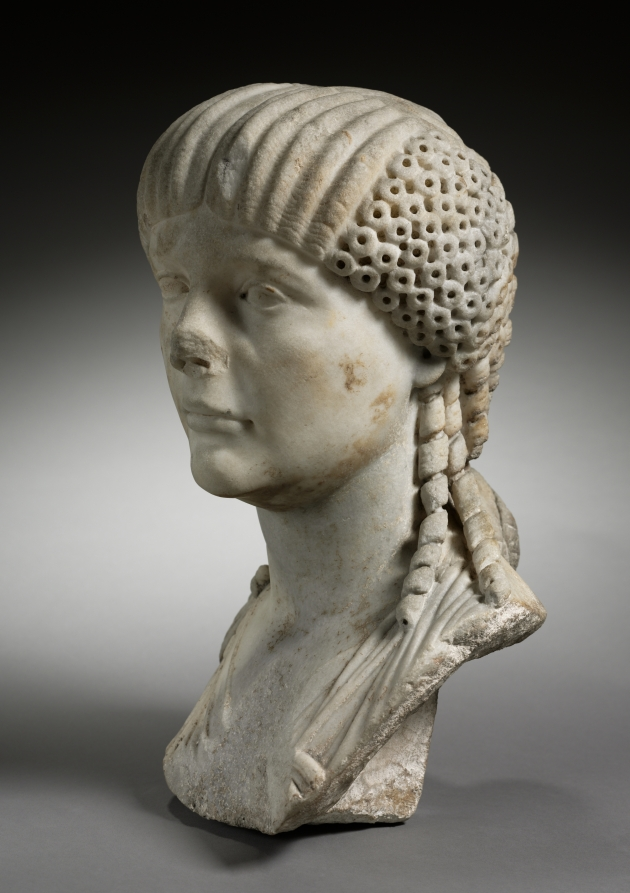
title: Portrait Bust of the Empress Claudia Octavia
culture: Italy, Roman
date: 50–70 CE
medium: marble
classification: Sculpture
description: This portrait bust depicts a young woman whose idealized features and elaborate hairstyle may identify her as the empress Claudia Octavia (r. AD 54-62), unfortunate first wife of the notorious emperor Nero. Over her tunic she wears a stola, a long garment hanging from both shoulders and distinguishing her as a married, upper-class woman. Although beloved by the Roman citizenry and described by the historian Tacitus as “aristocratic and virtuous,” Octavia was eventually divorced and banished by Nero, then ordered put to death.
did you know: The complex coiffure includes four elements: parted waves (top), tight curls (sides), hanging ringlets (shoulders, back), and a braided knot (back).